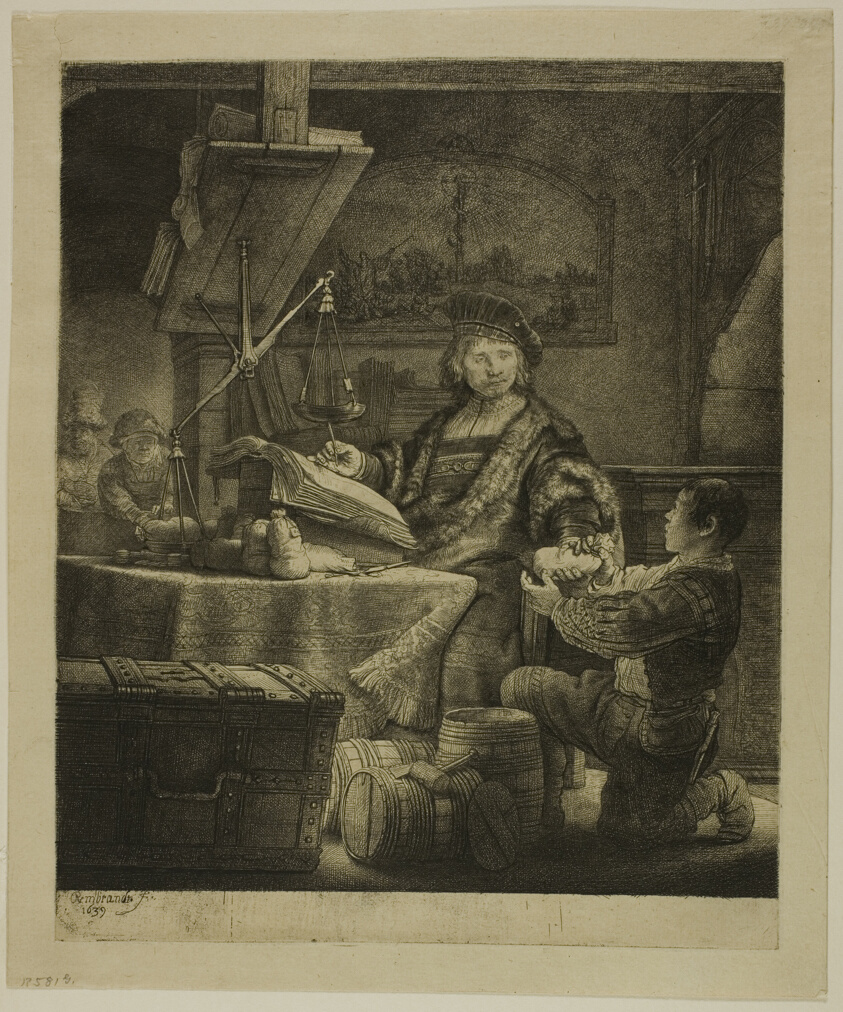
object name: Print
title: Jan Uytenbogaert, Receiver-General ("The Goldweigher")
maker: Rembrandt van Rijn (Dutch, 1606-1669)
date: 1639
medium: Etching and drypoint on Japanese paper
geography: Holland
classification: etching; print; prints and drawing; paper; drypoint